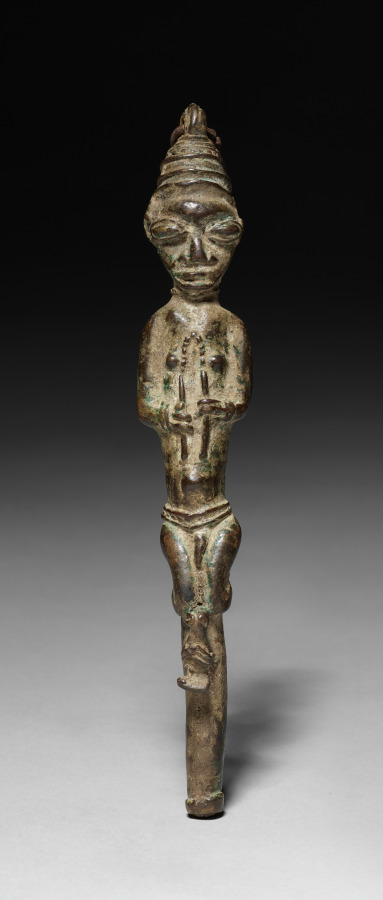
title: Pair of Ritual Staffs (ẹdan Ògbóni)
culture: Africa, West Africa, Nigeria, Yorùbá-style maker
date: 1800s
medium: Copper alloy and iron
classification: Sculpture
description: The chain connecting these two figures allows them to be worn in public by a member of the Ògbóni or Òṣùgbó association as authority emblems. The male on the right gives the association’s typical salute by clasping his left fist on the right one, while the female on the left holds her breasts as a sign of welcome and generosity. The use of copper alloy and iron expresses Ògbóni/Òṣùgbó's concerns with longevity and durability. Long iron spikes would have originally protruded from each figure's base.